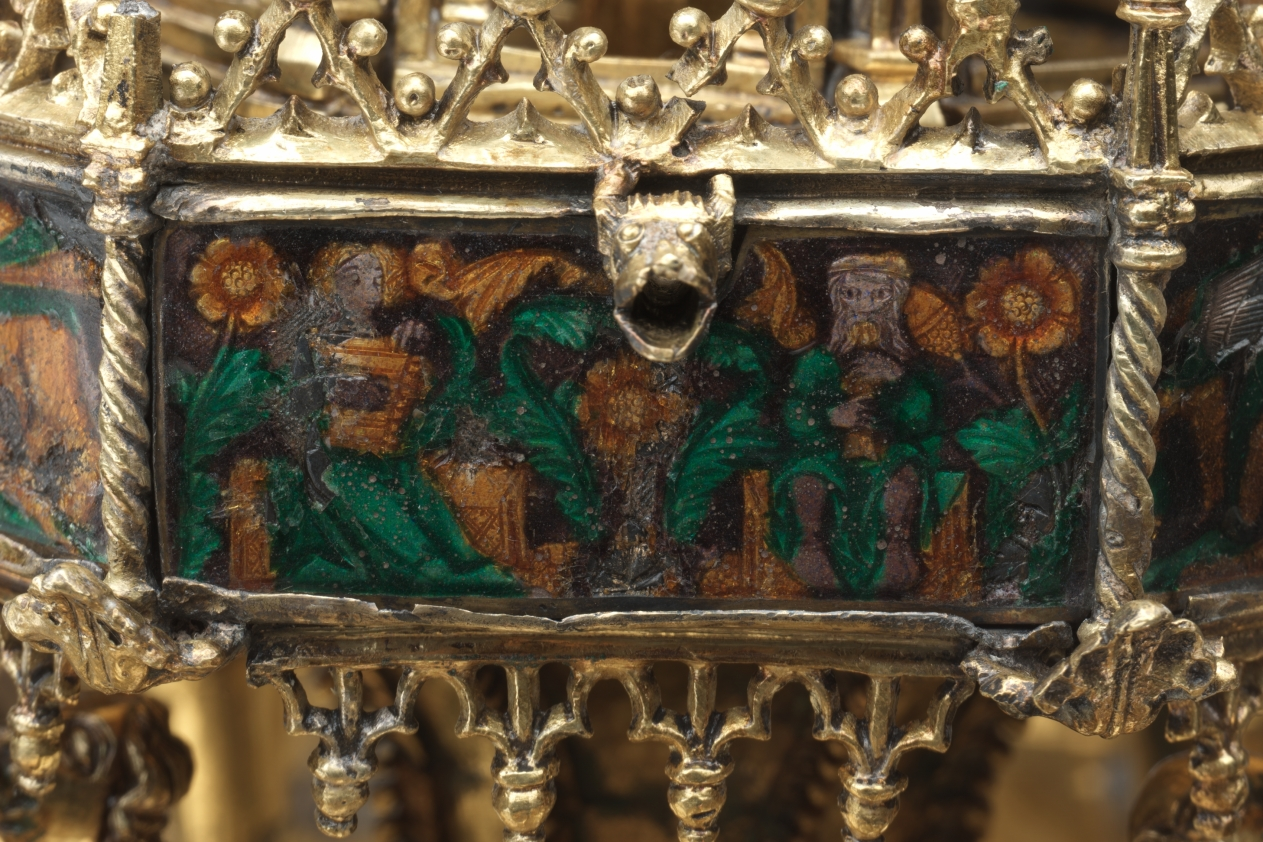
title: Table Fountain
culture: France, Paris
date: c. 1320–40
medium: gilt-silver and translucent enamels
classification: Metalwork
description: Conceptually and stylistically, this object is beyond all else a piece of Gothic architecture in miniature with vaults, pinnacles, columns, and traceried arches. Though the artist who created it is unknown, he was unquestionably inspired by the great Gothic buildings of his time. The table fountain is a three-tiered assembly combining cast elements with bent sheets of gilt-silver. To these have been attached a series of enamel plaques representing grotesque figures, some of which play musical instruments. Water wheels and bells were added to capture motion and sound. The rich detail, precious materials, and involved ornamentation of this deluxe object suggest it would have been expensive to produce and highly treasured by its original owner, someone of high status, and would have been deployed as an object of spectacle. This is the most complete example of its type known to survive from the Middle Ages. Medieval inventories reveal that small fountains like this, often taking various forms, and generally made from precious metals, once existed in large numbers, thus making the Cleveland table fountain an extremely rare object.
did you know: This fountain with its minute architectural details and finely made enamel plaques displayed the wealth and refinement of the owner as it entertained his guests. Imagine hearing the ringing of the tiny bells when this fountain was in use.